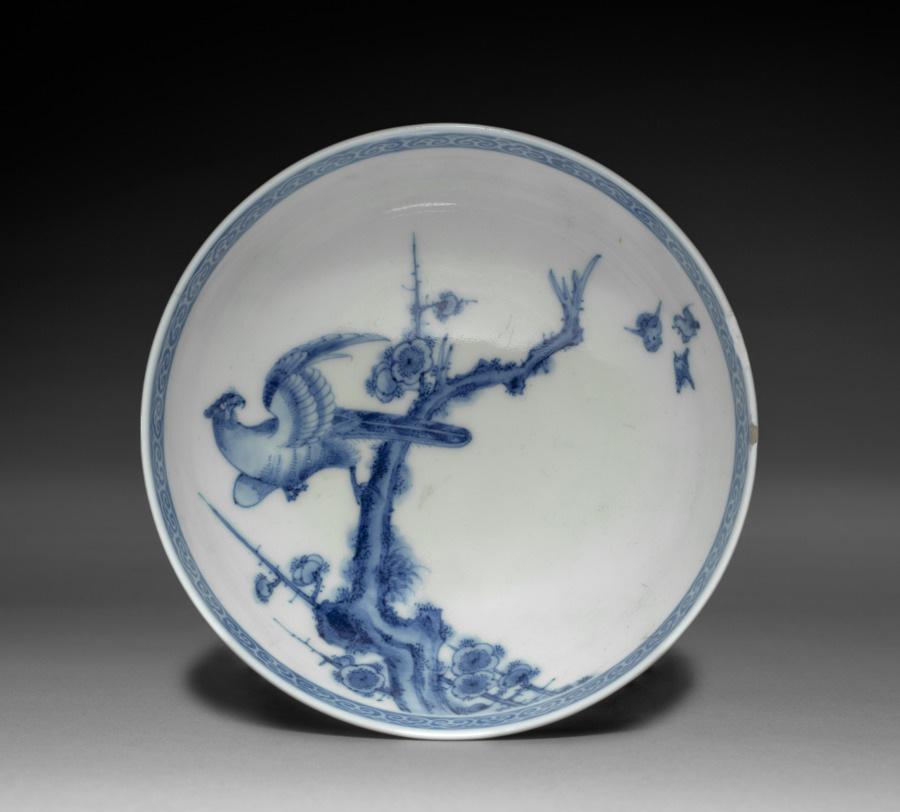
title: Dish with Hawk and Sparrows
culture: Japan, Meiji period (1868–1912) or Taishō period (1912–26)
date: c 1900– 1925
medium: Porcelain with underglaze blue decoration (Hizen ware)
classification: Ceramic